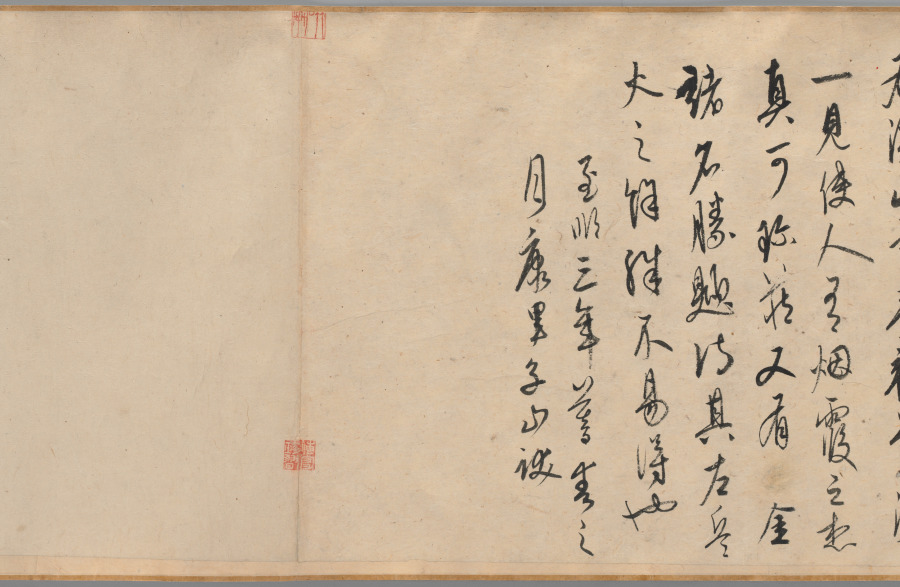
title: Streams and Mountains without End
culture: China, late Northern Song dynasty (960-1127) - Jin dynasty (1115-1234)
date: 1100–1150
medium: handscroll; ink and slight color on silk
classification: Painting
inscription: 9 colophons and 48 seals: 1 colophon, dated 1205, of Wang Wenwei 王文蔚 (dates unknown); 1 colophon, dated 1205, of Li Hui 李惠 (dates unknown); 1 colophon of Weiluo Tian Xie 蔚羅田獬 (dates unknown); 1 colophon, dated 1214, of He Yan 何言 (dates unknown); 1 colophon, dated 1326, of Cao Yuanyong 曹元用 (d. 1329) 1 colophon, dated 1332, of Kangli Zishan 康里子山 (Naonao; 1295-1345); 1 colophon, dated 1336, of Liu Zai 劉載. (dates unknown); 1 colophon, dated 1380, and 4 seals of Yang Mao 楊懋 (1300-after 1380); 4 seals of the Hou family (ca. 1340); 1 colophon of Wang Duo 王鐸 (1592-1652); 4 seals of Zhang Bingqian 張秉乾 (juren of 1729); 8 seals of Liang Qingbiao 梁清標 (1620-1691); 2 seals of the Qianlong emperor (r. 1736-95); 4 seals of the Jiaqing emperor (r. 1796-1820); 3 seals of the Xuantong emperor (r. 1909-11); 2 seals of Ye Gongchuo 葉恭綽 (1881-1968); 17 seals of Zhang Yuan 張爰 (Zhang Daqian 張大千, 1899-1983).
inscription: Colophon 1. Wang Wenwei 王文蔚. Dated third month and third day, 1205, under the reign of Zhangzong of the Jin dynasty. 造物元無心，山川秀氣聚。畫手亦無盡，各出新意度。 誰將妙林泉，淡墨寫縑素。重巒疊嶂間，三兩人家住。 茅舍隔素籬，小橋通細路。溪上數葉舟，雅有物外趣。 嵓崦藏招提，依稀認窗戶。山色四時宜，雲煙自朝暮。 不知塵世中，此景在何處。收拾買山錢，投老好歸去。 泰和乙丑三月三日平原王文蔚謹再拜，書于河東縣署之野趣堂。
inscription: Colophon 2. Li Hui 李惠. The colophon was written three days before the Qingming Festival in 1205. 畫師慣在山中居，含毫吮墨聊自娛。 閑將一段冰霜絹，寫出千里江山圖。 前山後山互出沒，山腰林樾相縈紆。 危橋澗溜瀉鳴玉，山根一匯為平湖。 波平短艇快漁釣，雲深細徑來樵蘇。 僊宮梵宇占幽勝，雕欄複閣森蓬壺。 往來行客煙靄外，飄飄野店青帘孤。 人家雞犬聲相接，熙熙化日安唐宇。 嗟余嗜好何其迂，膏肓泉石真吾徒。 一行作吏墮世網，薄書汨沒勞奔趨。 千巖萬壑但夢想，故園三徑應將蕪。 披圖暫洗黃塵眼，拊膺三嘆空踟躕。 泰和乙丑清明前三日絳臺李惠書于舜城府署之九思堂。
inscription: Colophon 3. Weiluo Tian Xie 蔚羅田獬. 畫工紛紛不可紀，擺脫俗流幾人耳。 夫誰援筆掃鵝溪，一段風煙且千里。 白波青嶂渺無窮，水接山兮山插水。 小橋野店相勾連，古寺樓臺突兀起。 飄然氣象與神俱，但患未明孰姓氏。 郭熙雖老典型存，為問主公無乃是。 此畫世希當寶藏，無與碌碌同一視。 更看卷首數公詩，奇絕清新相表裏。 蔚羅田獬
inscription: Colophon 4. He Yan 何言. Written in 1214. 萬有來自無，一真歸所託。畫師得三昧，胸中幻丘壑。 百態逐墨破，群形隨筆落。地近迹分明，天遙痕隱約。 雲物自吐吞，峯巒非斧鑿。江鄉閴無市，谷關常不鑰。 中有野夫閑，童琴而歩鶴。酒斾出籬懸，漁舟臨岸泊。 澗樹蔽橋樑，巖松迷殿閣。岑疊宿霧重，野曠林煙薄。 危棧接縈紆，亂泉通脈絡。途中人往來，僕馬何羸弱。 怪石虎踡跼，古木龍蟠錯。一幅宜好收，千金非易博。 玉堂閑卷舒，眼界增寥廓。視險尚寛平，見危除慘虐。 氣象溢國華，川澤資廟略。功名業已書，歸去鞭先著。 但知色即空，何是今非昨。飽乎仁智心，箇中無限樂。 貞祐甲戌秋暮，東營何言題。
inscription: Colophon 5. Cao Yuanyong 曹元用 (d. 1329). Dated 1326. 岸擁危橋斷，溪浮小艇斜。 萬山最深處，依約兩三家。 泰定丙寅秋，曹元用題。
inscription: Colophon 6. Kangli Zishan 康里子山 (i.e., Kangli Naonao). The colophon bears a date of 1332. 右溪山圖，意韻蕭灑。一見使人有烟霞之想，真可珍藏。又有□金諸名勝題詩其左。兵火之餘， 殊不易得也。 至順三年暮春之月，康里子山跋。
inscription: Colophon 7. Liu Zai 劉載. 雲拂埜田閑種玉，雨餘巖溜碎傾金。 幾時也結團茆去，麟閤恬然不挂心。 至元二年正月，長安劉載載之謹錄上。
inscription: Colophon 8. Yang Mao 楊懋 (1300–after 1380). 觀此圖，經營位置，筆法高古，山明石潤。其橋梁、路道、樹林、人物、遠近；一一誠得真山水之深趣。非當時名筆有大才者不能至此。不必問其誰何，可為神品。况宋金元三朝名公所跋，尚不能記，想其來尤遠矣。然而物經累變而尚存，是物之有壽者也。余不復再論。文顯其保之。洪武庚申春，八十翁楊懋觀。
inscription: Colophon 9. Wang Duo 王鐸 (1592–1652). 文蓀親翁博雅，文詩鴻暢。舍弟持此喜觀，遂抽管題數語： 山勢委折，筆墨無痕。宋人中如此不多見也。譬之兵家，當是韓白。王鐸。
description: Streams and Mountains without End was a landmark acquisition of 1953, made just a year after Sherman Lee had returned to Cleveland as curator of Oriental art. He acquired it with the intention to provide "a more than adequate foundation for a fine collection of Chinese landscape painting." This impressive work demonstrates the culmination of stylistic developments in Chinese monumental landscape painting following the Northern Song tradition. It represents a journey through a landscape, making it a fitting metaphor for Lee’s journey of discovery and achievement over a lifetime.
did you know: The portrayal of the distant lands is rich with details like pavilions, villages, and human activities.